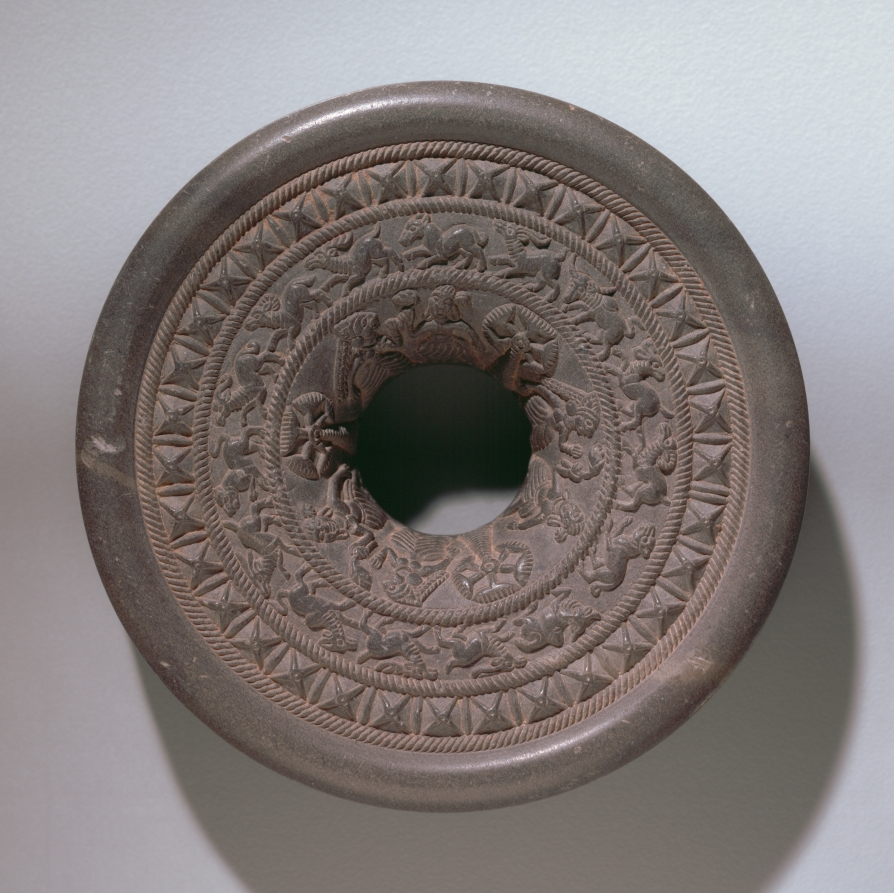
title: Ringstone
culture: India, Maurya period (322–185 BCE)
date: 200s BCE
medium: steatite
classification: Sculpture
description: Ringstones are among the earliest works of art to be created in stone during India's historical period. This example is finely carved with detailed images of affectionate couples and palm trees, running animals, and geometric motifs in concentric circles. The function of ringstones remains uncertain, since none of the surviving examples is inscribed or explained in a text.